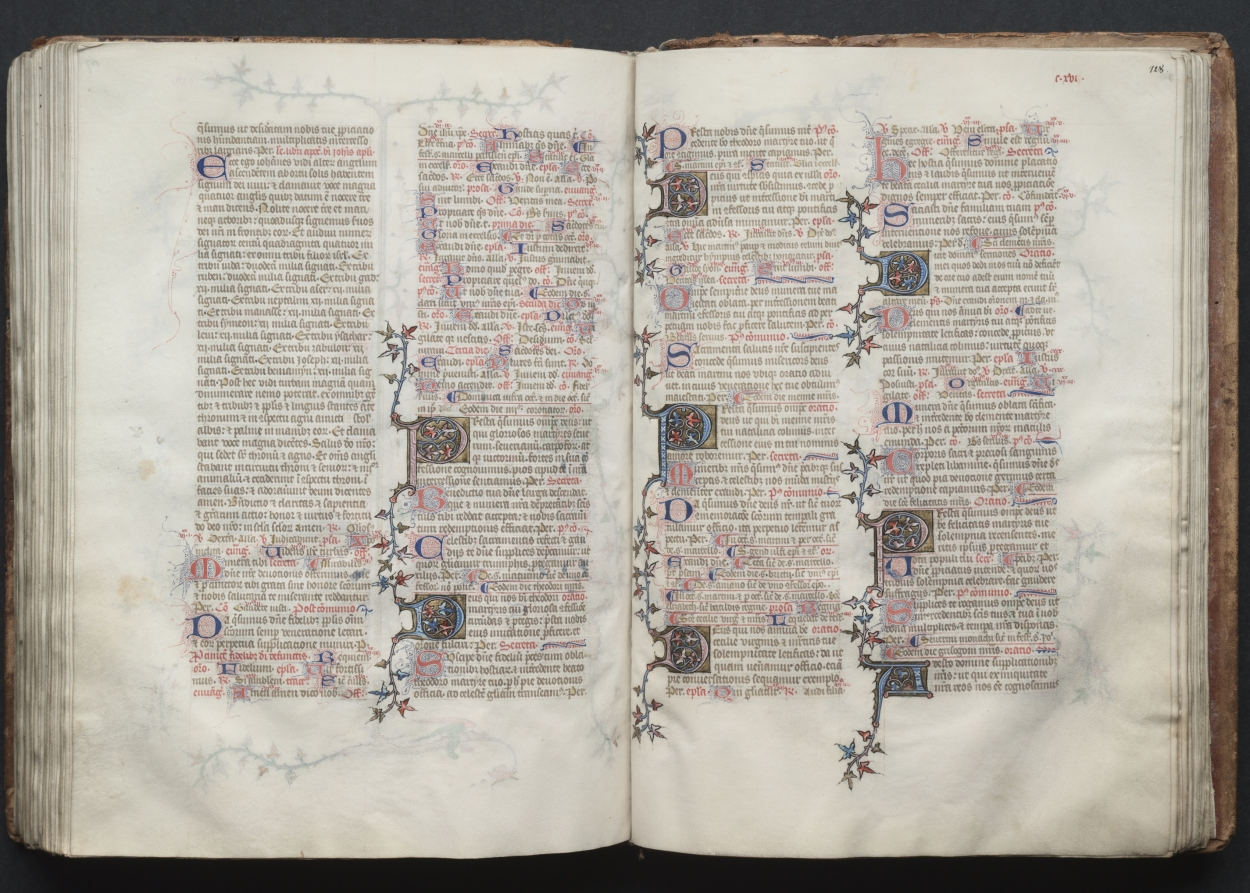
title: The Gotha Missal: Fol. 128r, Text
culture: France, Paris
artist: Master of the Boqueteaux (French)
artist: and Workshop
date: c. 1375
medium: ink, tempera, and gold on vellum; blind-tooled leather binding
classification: Bound Volume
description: The style and quality of this manuscript's decoration is typical of deluxe Parisian books made for aristocratic or royal patrons. Most of the book's decoration appears to be the work of the Master of the Boqueteaux, an artist active at the court of King Charles V (died 1380). His style was apparently shared by a number of book illuminators working in and around Paris. It is very possible that the Gotha Missal belonged to Charles V, but is not provable because the manuscript has no royal portraits and lacks a colophon. Given the book's magnificent decoration, however, it would seem that it was produced for a Valois prince, if not for the king himself. The manuscript receives its name from the German dukes of Gotha, its later owners.